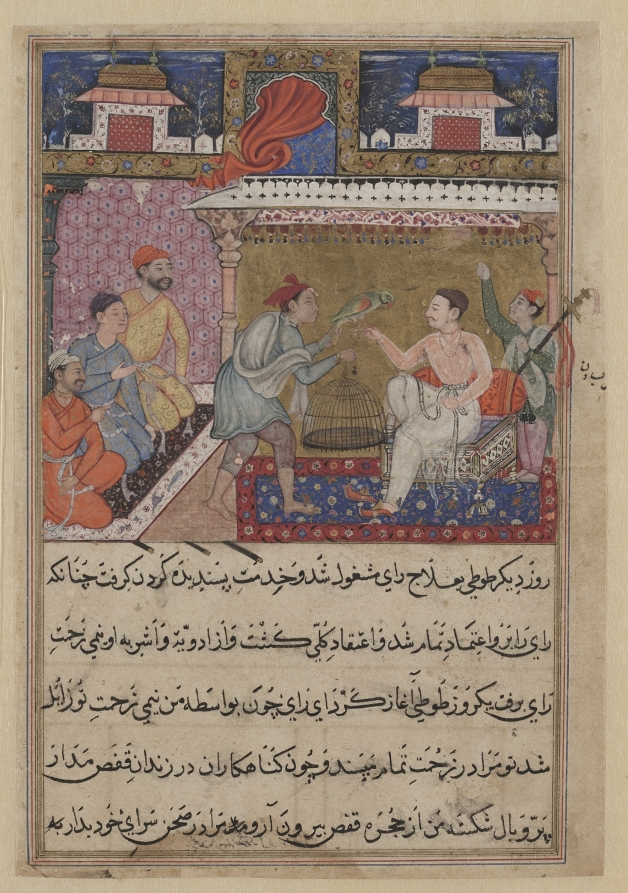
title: The hunter offers the mother parrot to the king of Kamarupa, from a Tuti-nama (Tales of a Parrot): Fifth Night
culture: Mughal India, court of Akbar (reigned 1556–1605)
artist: Basavana (Indian, active c. 1560–1600)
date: c. 1560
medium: gum tempera, ink, and gold on paper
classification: Painting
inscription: 'amal basāwan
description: The king of Kamarupa, which ironically means “body of erotic love,” had leprosy. The hunter brought the captured mother parrot to the king, assuring him that the bird knew a cure. The lavish use of gold indicates that this book was a costly production. The figure of the hunter reveals the talents of the artist Basavana, whose name is written in the right margin. Draped in rustic garments shaded to appear softly flowing, the hunter bends forward with a subtle look of shrewd expectancy as the king seems ready to pay a high price for the parrot. The billowing red curtain is one of Basavana’s signature motifs. Beyond is a tantalizing glimpse of the forest to which the parrot will soon escape to rejoin her children.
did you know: This leper king ruled a territory that stretched from Bhutan to Assam and Bengal.